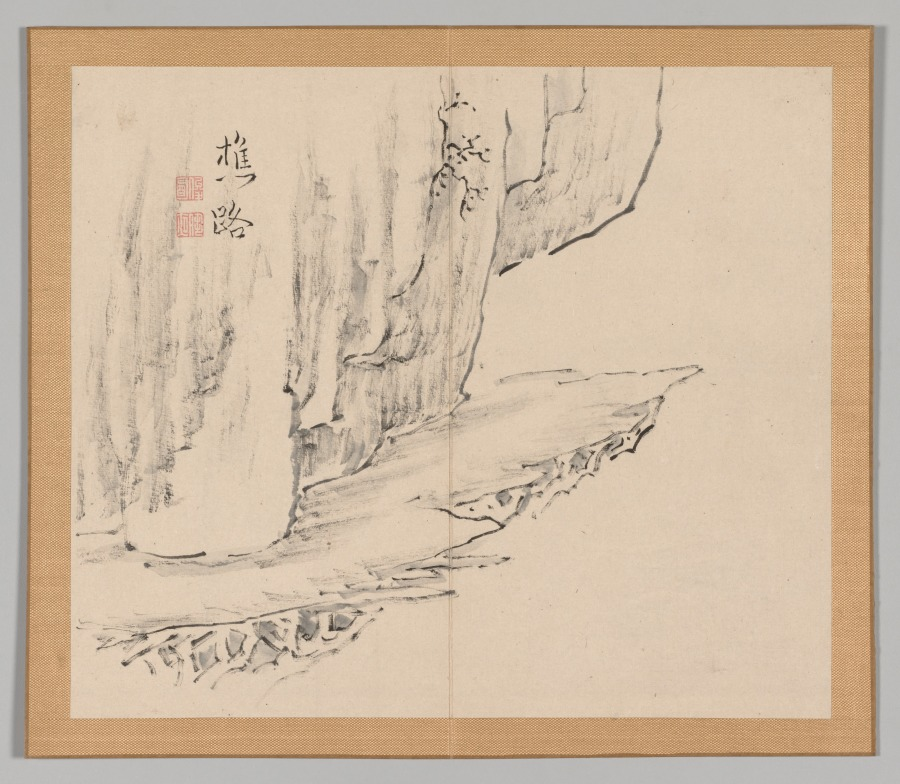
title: Reverberations of Taiga, Volume 1 (leaf 31)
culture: Japan, Edo period (1615–1868)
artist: Aoki Shukuya (Japanese, d. 1802)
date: mid- to late 1700s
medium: double-leaf from a pair of albums; ink and light color on paper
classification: Portfolio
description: Traditionally, young painters in Japan began their studies with an established master-painter. The master's compositions invariably became models that the apprentice copied to learn various ink and brush techniques. Shukuya was a pupil of the famous Kyoto artist Ikeno Taiga, whose style is reflected in these sketches of rocks, trees, and mountains.